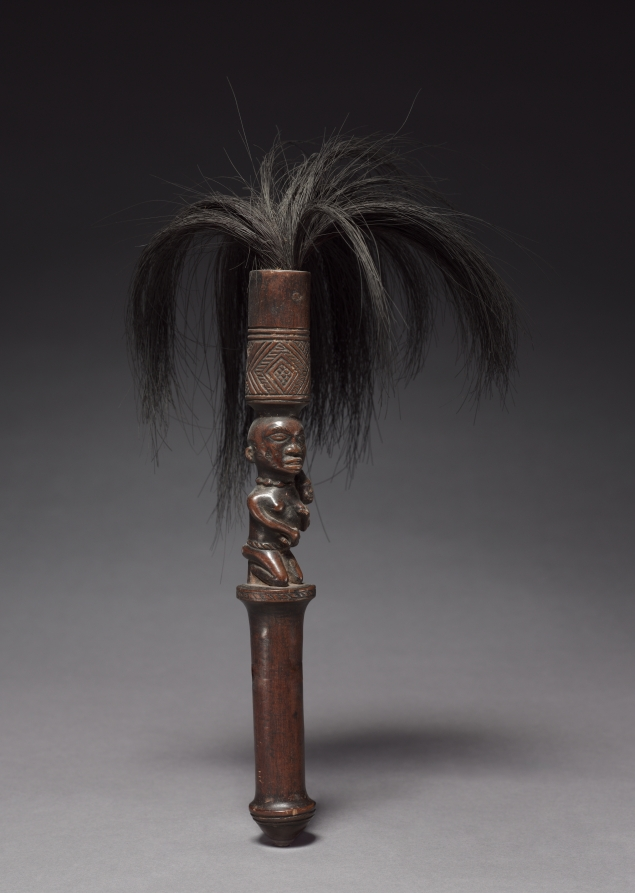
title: Flywhisk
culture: Africa, Central Africa, Democratic Republic of Congo (most likely), Cabinda, or Republic of the Congo, probably Yombe-style maker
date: late 1800s-early 1900s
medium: Wood and animal hair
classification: Sculpture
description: In Central Africa, flywhisks denoted status, rank, and function, rather than used to whisk away flies. Commonly associated with chiefs and titleholders, they were also owned by diviners and healers. Their purpose may also have been used to purify spaces, bless people, places, or things, and settle disputes. Flywhisks rarely depict women; yet this finely carved miniature of a woman kneeling signifies obedience and respect.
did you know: Rarely do flywhisks depict a female figure.